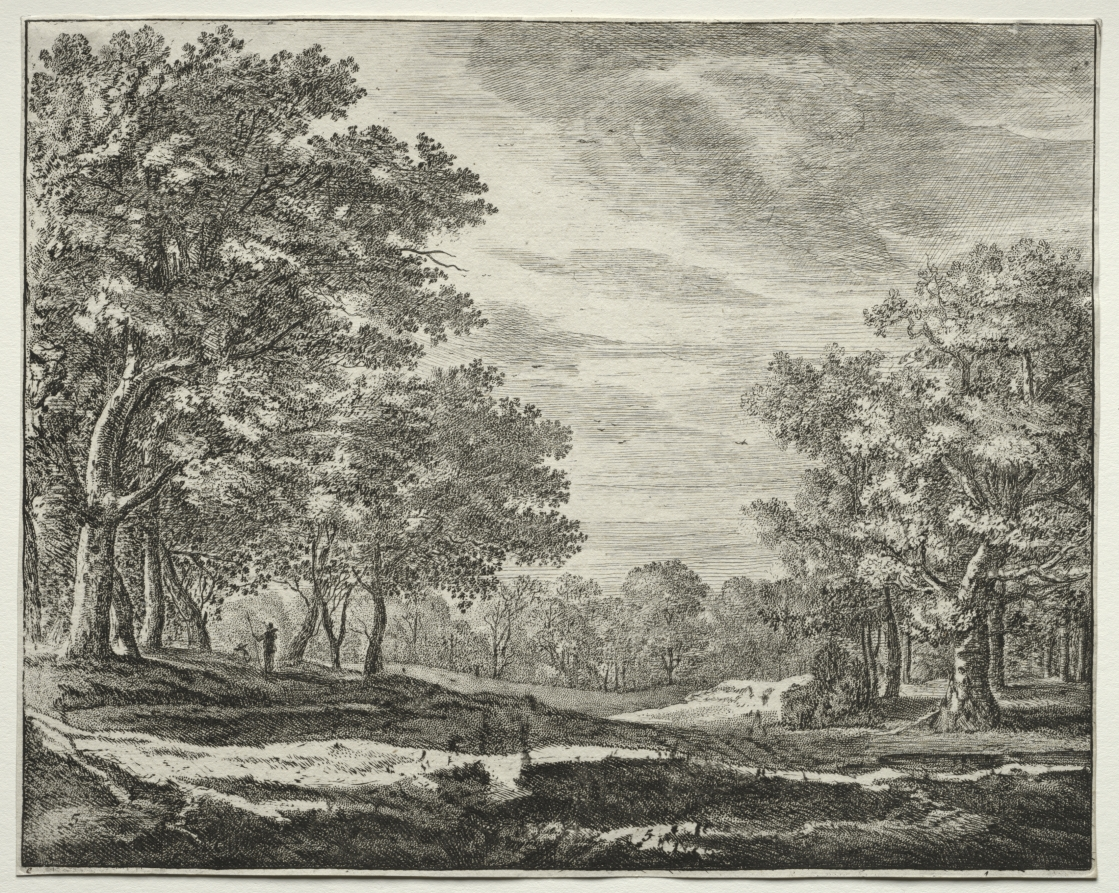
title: Six views in the Wood of the Hague: Plate 5, A Man with a Staff in His Hand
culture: Netherlands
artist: Roelant Roghman (Dutch, 1627–1692)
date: 1640–52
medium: etching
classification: Print